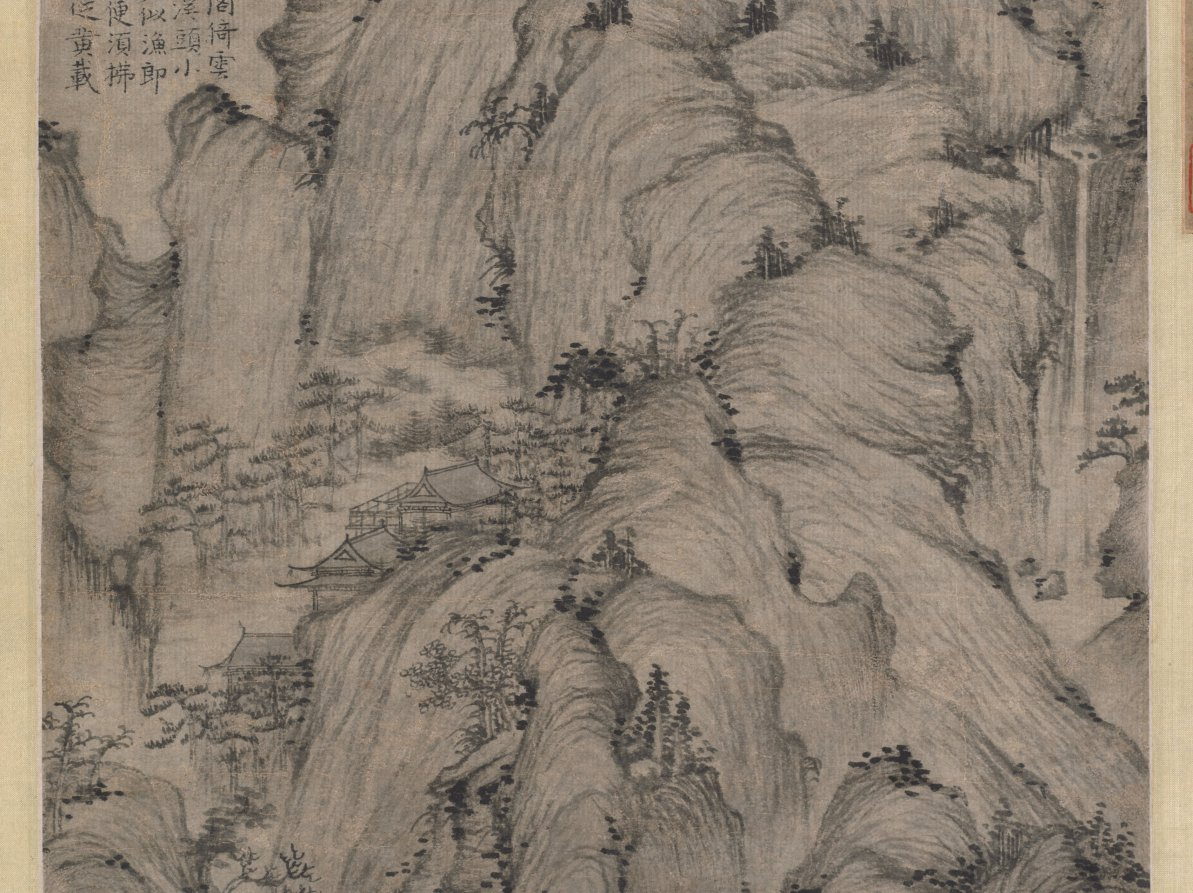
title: Streams and Mountains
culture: China, Yuan dynasty (1271-1368)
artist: Xu Ben (Chinese, 1335–1380)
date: 1372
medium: hanging scroll, ink on paper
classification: Painting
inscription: 綠樹黃鸝處處山， 偶從谿上看雲還。/ 人生未許全無事， 纔得登臨便是閑。 壬子七月十日徐賁為吉夫先生畫 並詩共上 [印] 幼文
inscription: Label on mounting probably by Liang Qingbiao 梁清標 (1620–1691).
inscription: 4 additional inscriptions and 9 additional seals: 1 poem of Xie Hui 謝徽 (c. 2nd half 14th c.); 1 poem and 1 seal of Gao Qi 高啟 (1336–1374); 1 poem and 1 seal of Lu Zhen 盧貞 (c. late 14th c.); 1 poem of Huang Zai 黃載; 3 seals of Liang Qingbiao 梁清標 (1620–1691); 1 seal of Wang Jiqian [C. C. Wang] 王季遷 (1907–2003); 3 seals unidentified.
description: Like many literati of the late Yuan and early Ming dynasties, Xu Ben was entangled with the perils of dynastic change as well as the ups and downs of his official career. It was mainly through the art of painting and poetry, as well as the ideal of reclusion, that he sought feelings of exhilaration and shared them with his friends. Xu created this monumental landscape during one of his periods of reclusion. His innumerable “hemp-fiber” texture strokes create a unifying rhythm among the towering mountains with tightly knit masses of rocks. Nestled among shady trees at the base of the mountain is a rustic retreat, which a scholar approaches on foot to visit with the hermit. Among the five inscriptions at the top of the painting is one by the artist himself. He dedicated the painting to someone named Jifu 吉夫 and recorded a poem in praise of mountains. Green trees, yellow orioles, everywhere are mountains; Aimlessly I return from the stream, where I watched the clouds. Man's life does not allow unbroken ease, But to be able to be high up in the mountain, this is leisure.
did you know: An attendant opens a reed gate to welcome the scholar with a walking stick approaching the rustic retreat.